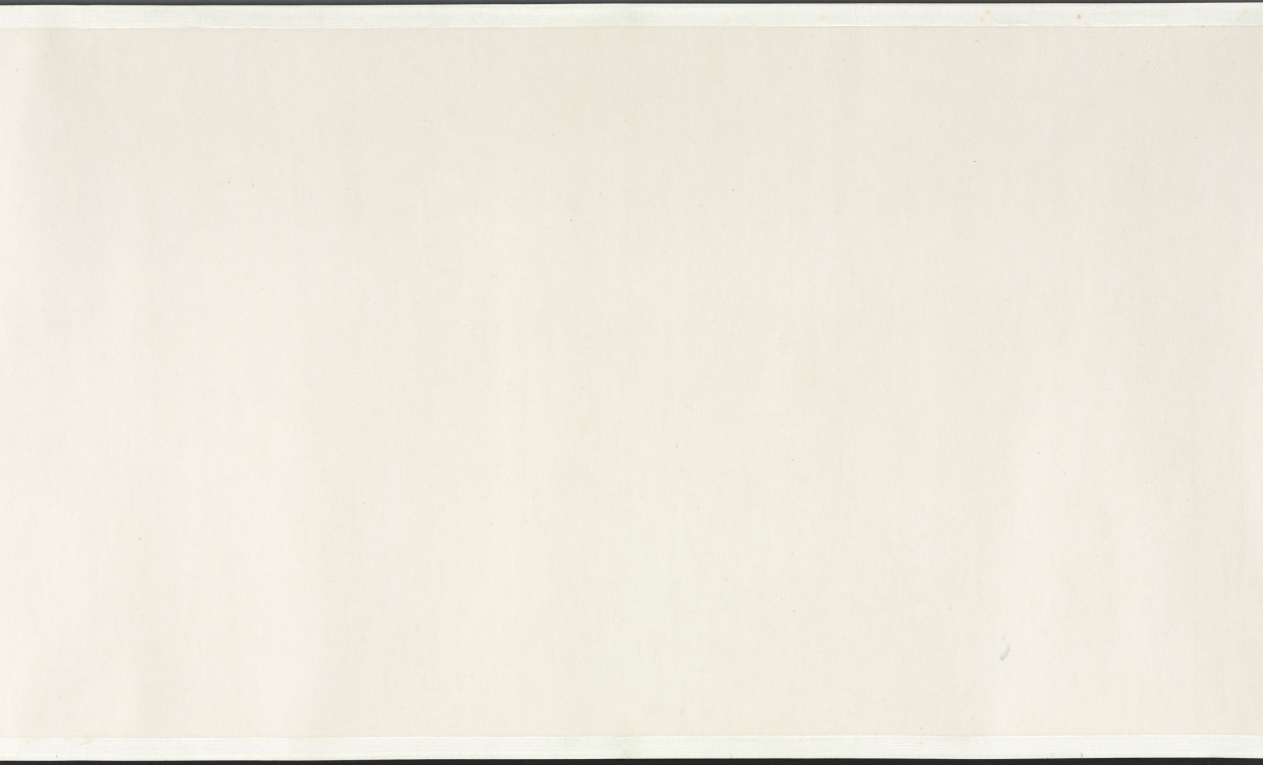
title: Buddha's Conversion of Five Bhiksu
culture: China, Yuan dynasty (1271–1368)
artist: Li Sheng (Chinese, active c. 1324–after 1375)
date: mid-1300s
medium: handscroll; ink on paper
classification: Painting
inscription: 紫篔生李升識 [印] 李氏子雲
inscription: 4 colophons and 12 additional seals: The "Heart" Sutra (Maha Prajnaparamita) text written by Wu Yuqing 吳餘慶 (active early 1400s); 2 seals of Xu Qianxue 徐乾學 (1631–1694); 3 colophons, one dated 1929 and two dated 1936, and 9 seals of Wu Hufan 吳湖帆 (1894–1968); 1 colophon, dated 1932, of Chen Dingshan; 1 seal unidentified.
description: This episode stems from the life of the historical Buddha, who, after his enlightenment, was initially hesitant about preaching his own doctrine. After much personal deliberation and prodding by deities, he finally relented. The first converts were the five guards who served him when he was still a prince. For Li Sheng, this is the pretext of the painting, which moves from the interaction of the bhiksu with the Buddha to a broader awareness of the vast surroundings of the scene.